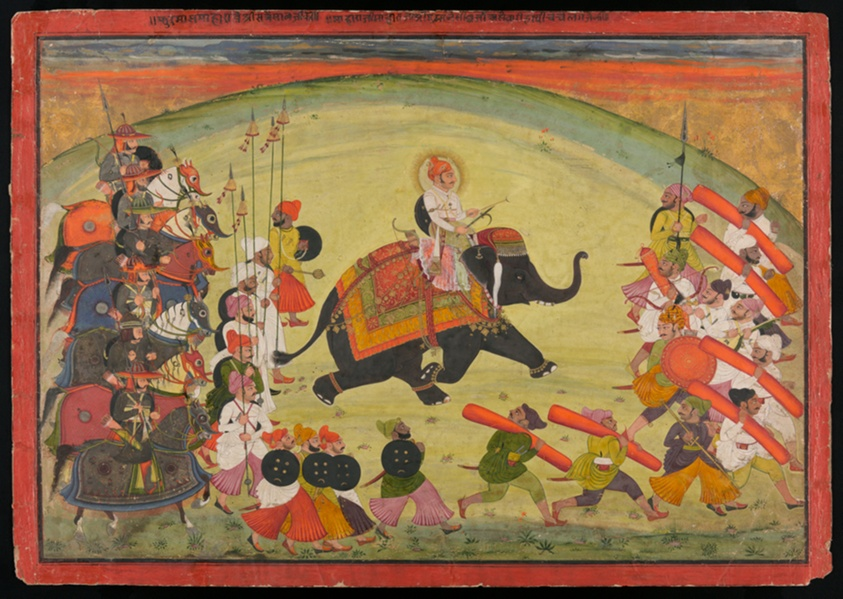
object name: Painting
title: Maharao Guman Singh Riding an Elephant in Procession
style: South Asian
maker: India; Rajasthan, Kota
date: dated 1770 (samvat 1827)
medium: Opaque watercolor, black ink, and gold on tan paper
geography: India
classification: watercolor; painting